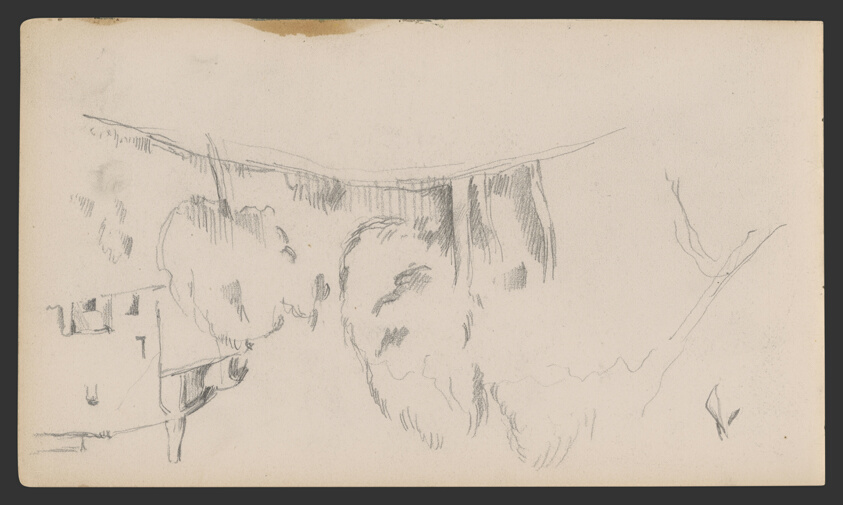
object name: Drawing and Watercolor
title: Sketchbook No. 2 (L'Estaque)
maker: Paul Cézanne; French, 1839-1906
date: 1875–86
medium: Graphite and pen and ink drawings on paper, bound into a book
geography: France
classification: sketchbook; graphite; prints and drawing; paper